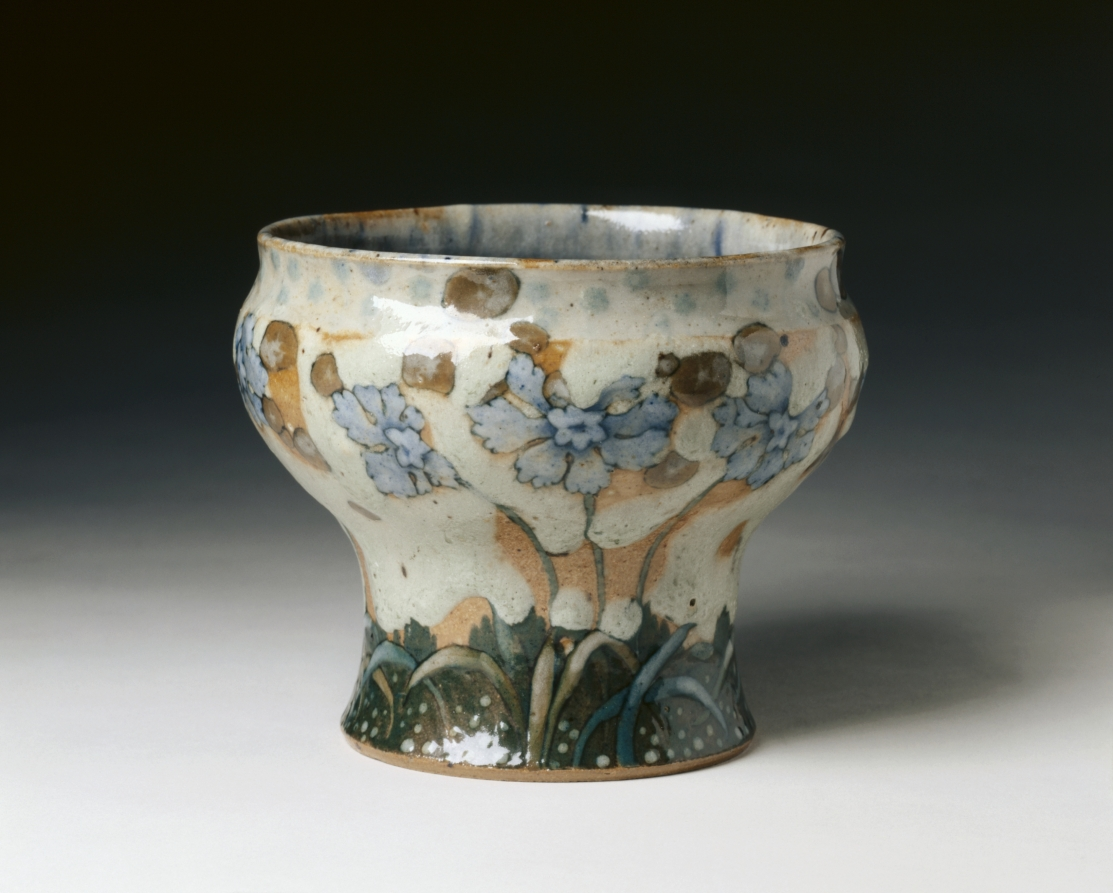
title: Bowl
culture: France, 19th century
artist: Albert Louis Dammouse (French)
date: c. 1900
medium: stoneware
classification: Ceramic